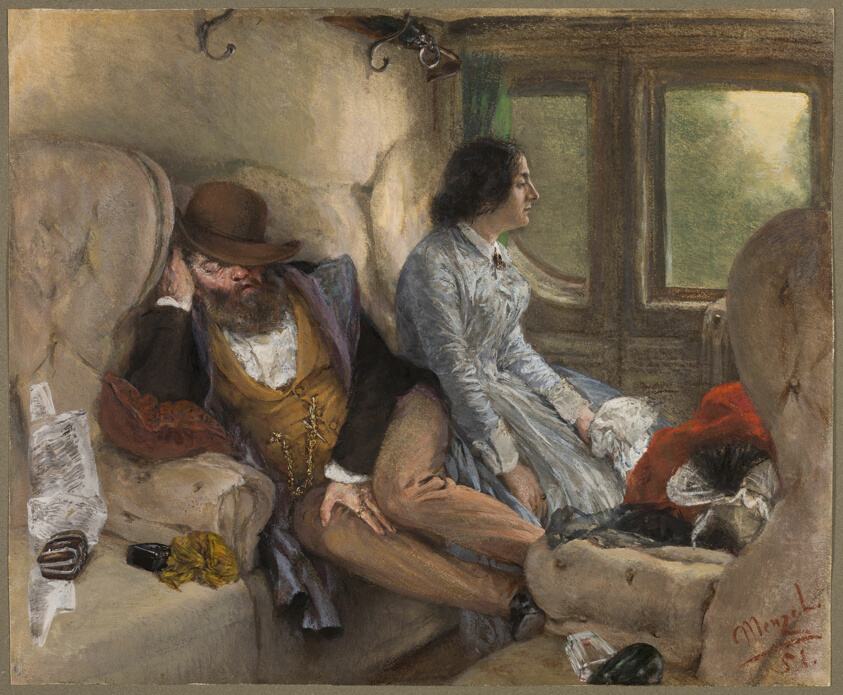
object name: Drawing and Watercolor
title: In a Railway Carriage (After a Night's Journey)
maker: Adolph Menzel; German, 1815–1905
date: 1851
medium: Gouache, with touches of pastel and oil paint, on cream wove paper, laid down on Japanese paper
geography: Germany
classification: gouache; prints and drawing; paper